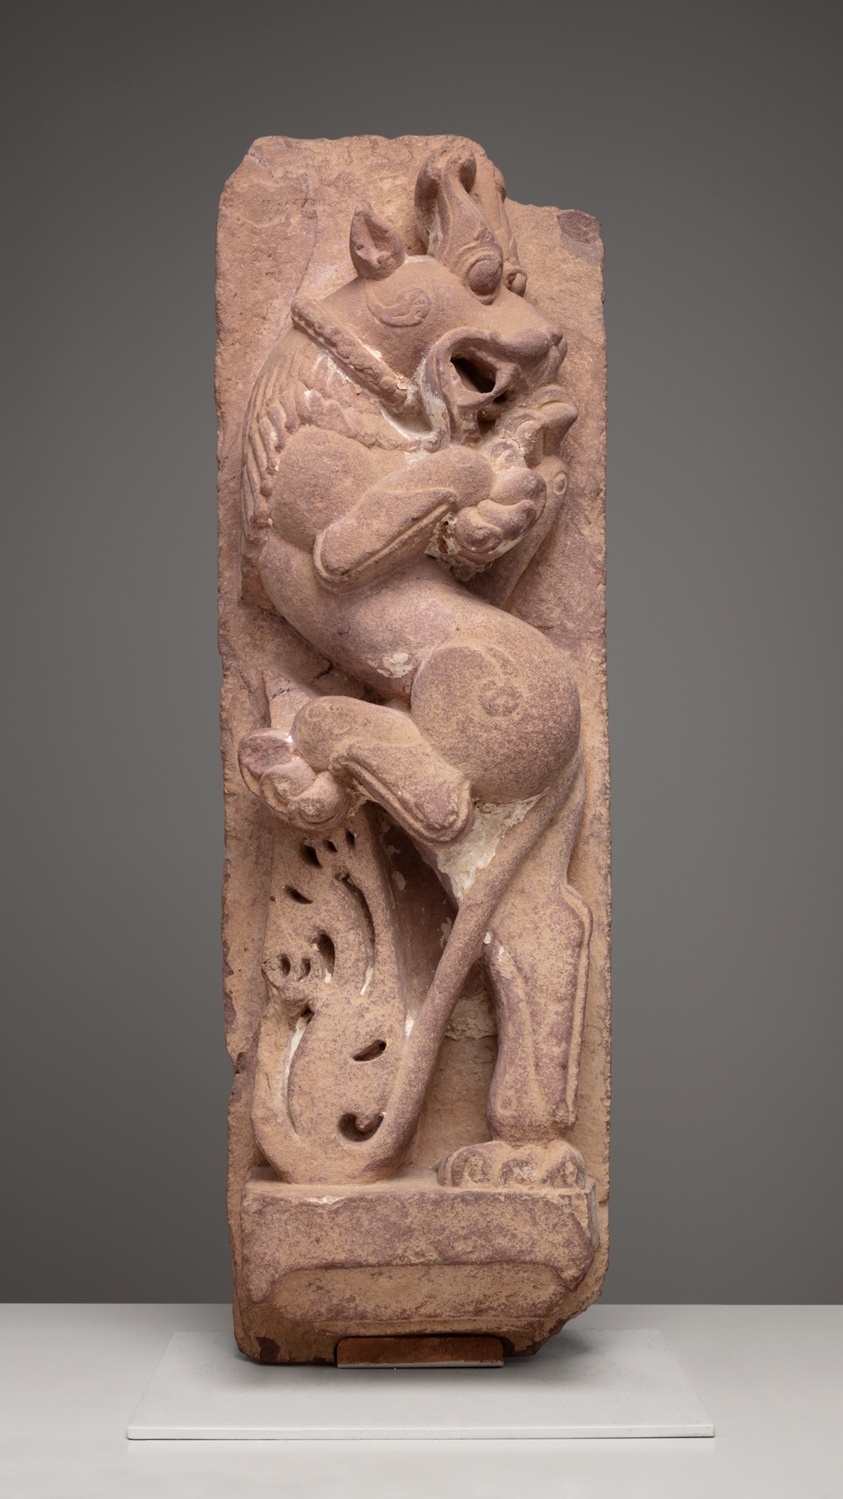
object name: Architectural fragment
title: Rampant Mythical Lions (Vyala)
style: South Asian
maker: India; Madhya Pradesh or Rajasthan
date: 8th/9th century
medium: Sandstone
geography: India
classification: sandstone; stone; sculpture; asian art; architectural fragment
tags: animals